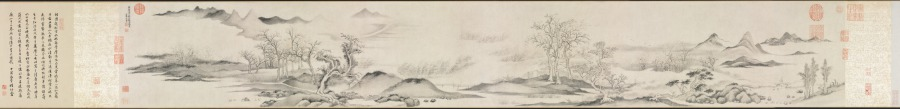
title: Water Village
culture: China, Ming dynasty (1368–1644)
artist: Wen Boren (Chinese, 1502–1575)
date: 1570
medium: handscroll; ink and light color on paper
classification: Painting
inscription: 隆慶庚午秋仿趙文敏筆. 五峰文伯仁 [印] 五峰山人; 文伯仁印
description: In the autumn of 1570, Wen Boren painted this seemingly unemotional scene of low-lying marshlands with a chain of rounded mountains in the background. A fishing boat is nestled on the shore near the village. Although paths and bridges traverse the landscape, only two people are visible in the stillness. From the restrained atmosphere of this landscape, one would never guess that Wen Boren was known as the “bad boy” of the Wu School for his explosive temper. As a younger man, he was even embroiled in a contentious lawsuit with his own uncle, Wen Zhengming (1470–1559), a master of Ming dynasty painting with whom he had trained. The ideal of the scholar-painter, or literati, was that an artist’s moral character is reflected in his paintings, so there was great incongruity between Wen Boren’s difficult personality and his restrained landscapes. A contemporary, Wang Shizhen, wrote this about him: "This gentleman is prone to behave odiously and screamed accusations at people. How is it possible for him to carry in his bosom such a wealth of scenic wonders?" Who knows what effort it took to subdue his fractious spirit to project an image of coolness and refined taste in his paintings?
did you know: A foreground tree has an eccentric twisting silhouette and pepper-dot "halo" of leaves.